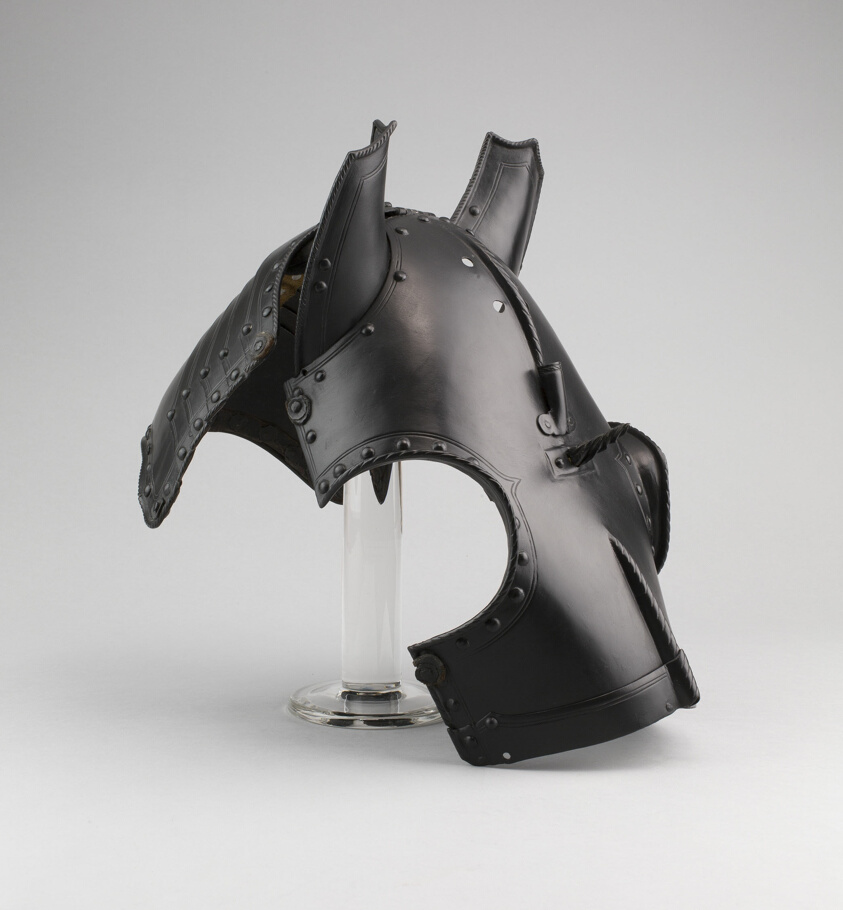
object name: Armor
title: Shaffron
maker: Pierre du Coudroy (Flemish, born France, 1560-about 1626); Brussels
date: about 1620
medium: Steel, paint, leather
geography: Brussels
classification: horse equipment; armor; arms and armor